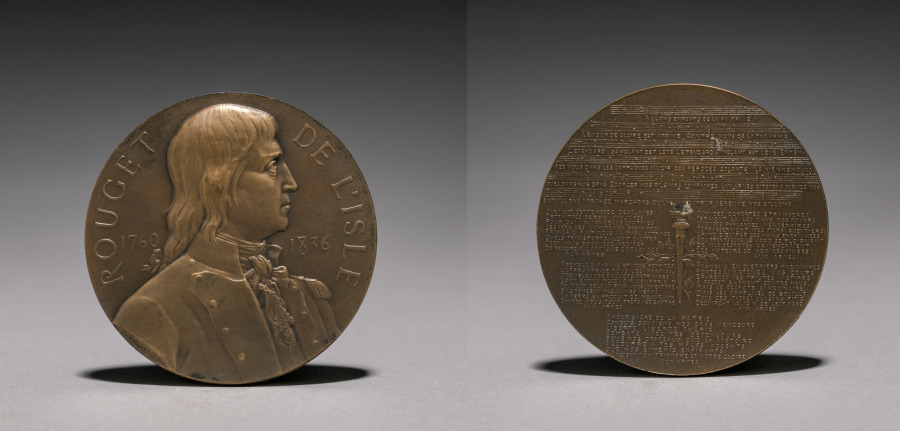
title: Medal of Claude Joseph Rouget de L'Isle (1760-1836)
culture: France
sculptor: Alfred Borrel (French, 1836–1927)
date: 1911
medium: bronze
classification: Metalwork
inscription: Obverse: raised inscription: ROUGET DE L'ISLE 1760 1836; inscribed lower left: A. BORREL Reverse: [score and all verses of "La Marseillaises"]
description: The French sculptor and medalist Alfred Borrel (1836-1927) created this portrait medal to commemorate the 75th anniversary of Rouget de L'Isle's death in 1836, the same year in which the sculptor was born.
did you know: Claude Joseph Rouget de L'Isle composed the French national anthem, La Marseillaises, in 1792 in Strasbourg after France had declared war on Austria.